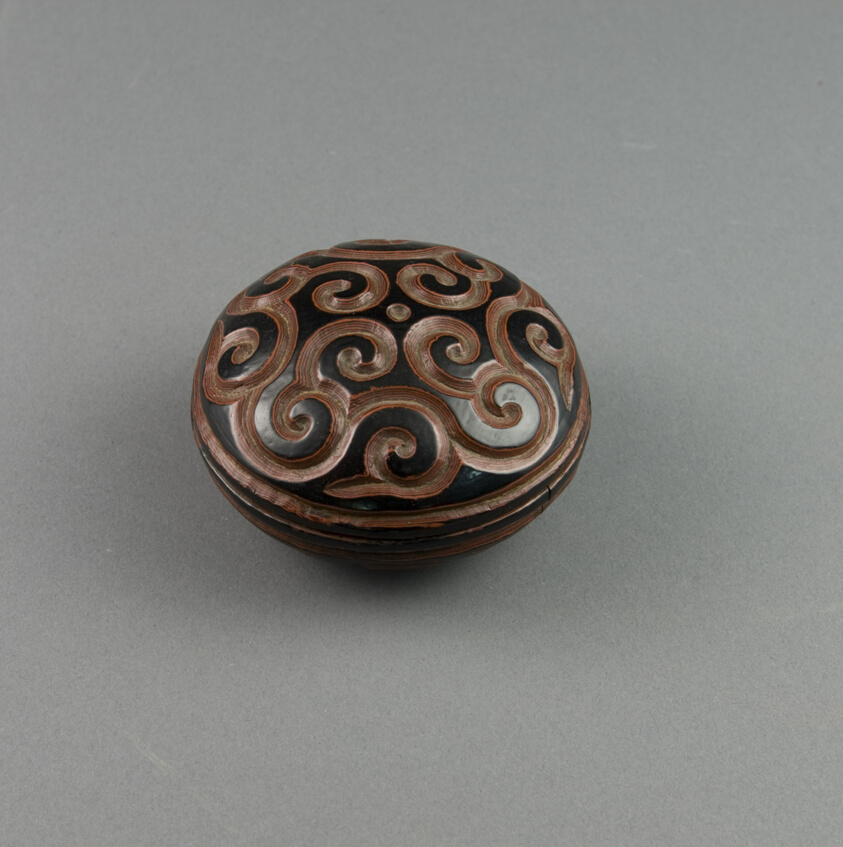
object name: Vessel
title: Carved Lacquer Box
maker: China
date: Qing dynasty (1644–1911), 19th century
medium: Lacquer with carved decoration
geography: China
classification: lacquerware; asian art; decorative arts